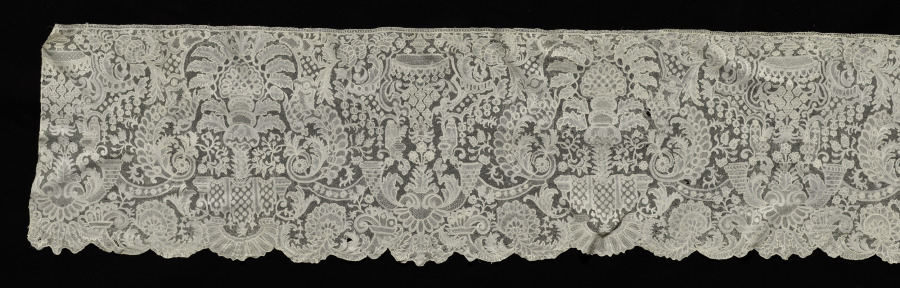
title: Lace Flounce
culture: Belgium, Brussels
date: early 1700s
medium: Bobbin lace (Point d'Angleterre)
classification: Lace